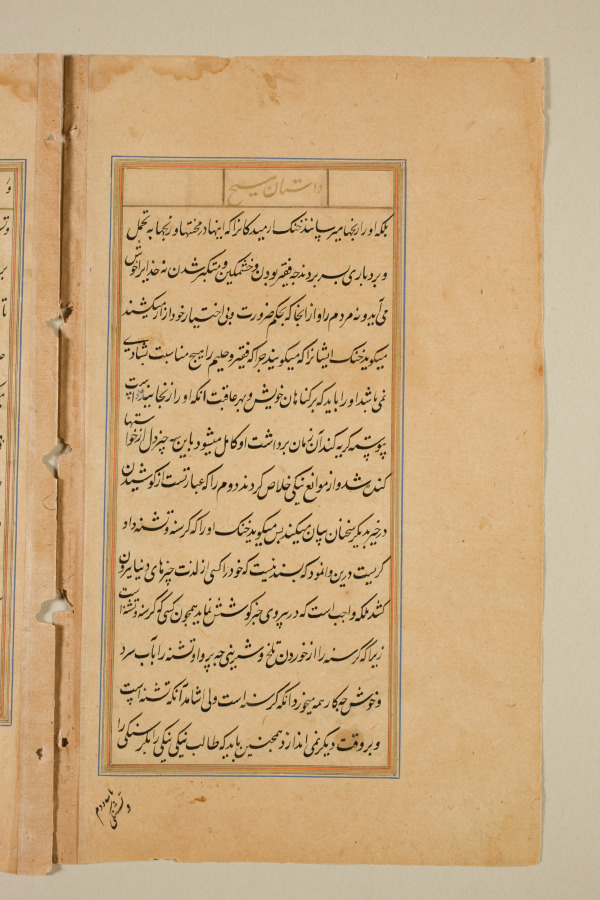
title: Text page from a Mirror of Holiness (Mir’at al-quds) of Father Jerome Xavier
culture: Mughal India, Allahabad, made for Prince Salim (1569–1627)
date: 1602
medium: Ink and gold on paper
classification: Manuscript